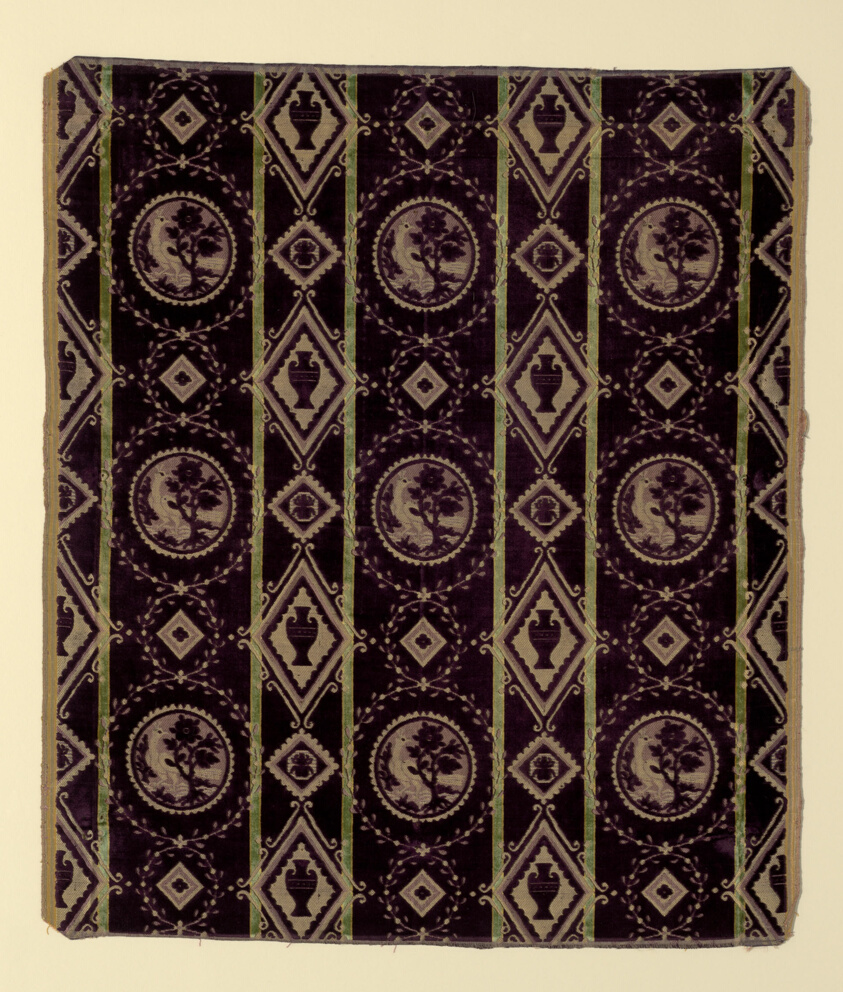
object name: Textile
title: Panel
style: directoire, european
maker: France; Auvergne (?)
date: 1775/1799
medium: Silk and cotton, plain weave with self-patterning by two-color complementary ground wefts with supplementary pile warps forming cut, voided velvet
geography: Northeastern France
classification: textile; weaving; weaving - velvet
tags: flowers, urns